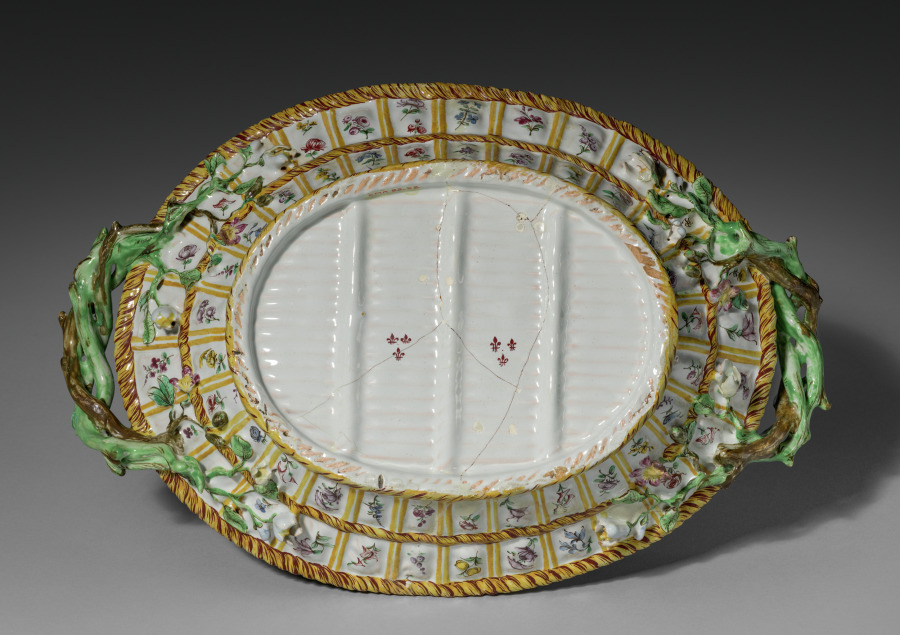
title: Tureen in the Form of a Basket of Game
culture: France, 18th century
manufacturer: Sceaux Factory (French, active 1748–66)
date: c. 1755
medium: Tin- glazed earthenware (faience) wth enamel decoration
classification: Ceramic